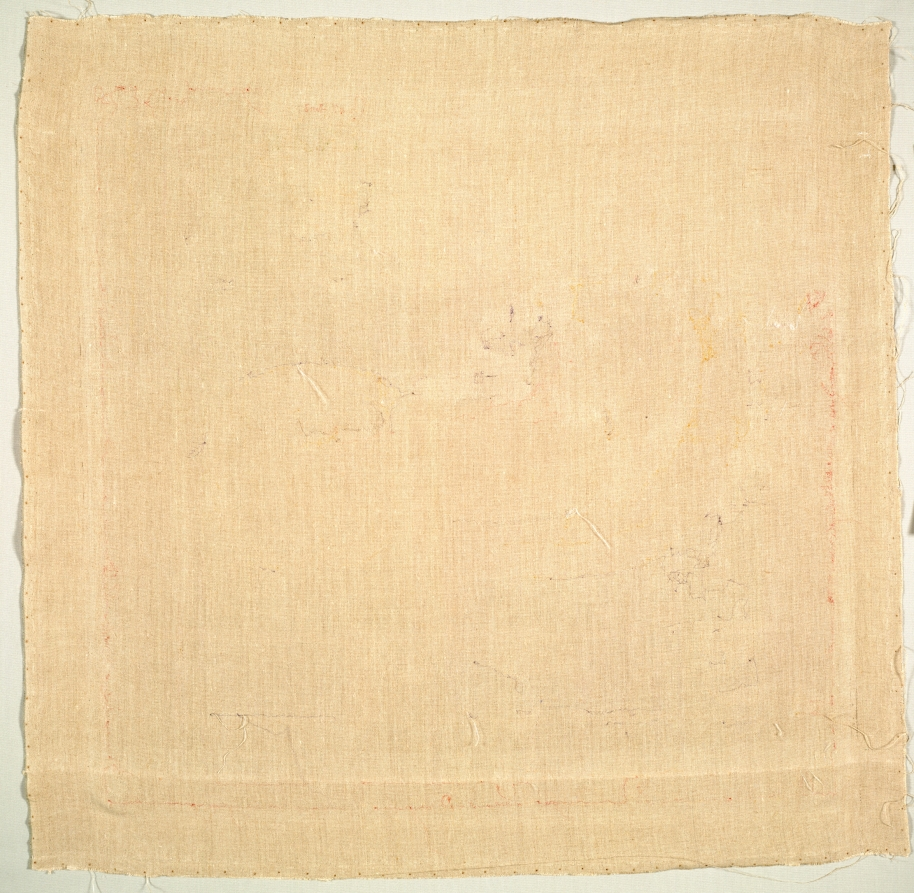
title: Nereid (Sea-Nymph) from a Hanging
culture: Byzantine Empire (Egypt)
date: late 300s–400s CE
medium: dyed wool, undyed linen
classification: Textile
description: The brilliant colors and complex design of this panel, likely one of several forming a tapestry, testify to its makers’ skill. Vines and birds frame a nereid, a mermaidlike mythological creature, against a dark blue ground. The weaver has aligned different-colored threads to create shading and special details. Blue threads representing water are integrated into the weaving of the glass bowl. Alternating pink and blue threads combine to create a smoky effect around the nereid’s eyes. Small spots across the surface are stable organic spores and fortunately do not affect the condition of this millennia-old textile.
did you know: Look closely at the eyeliner beneath the eye: it is formed by mixing two colors of thread, pink and blue.